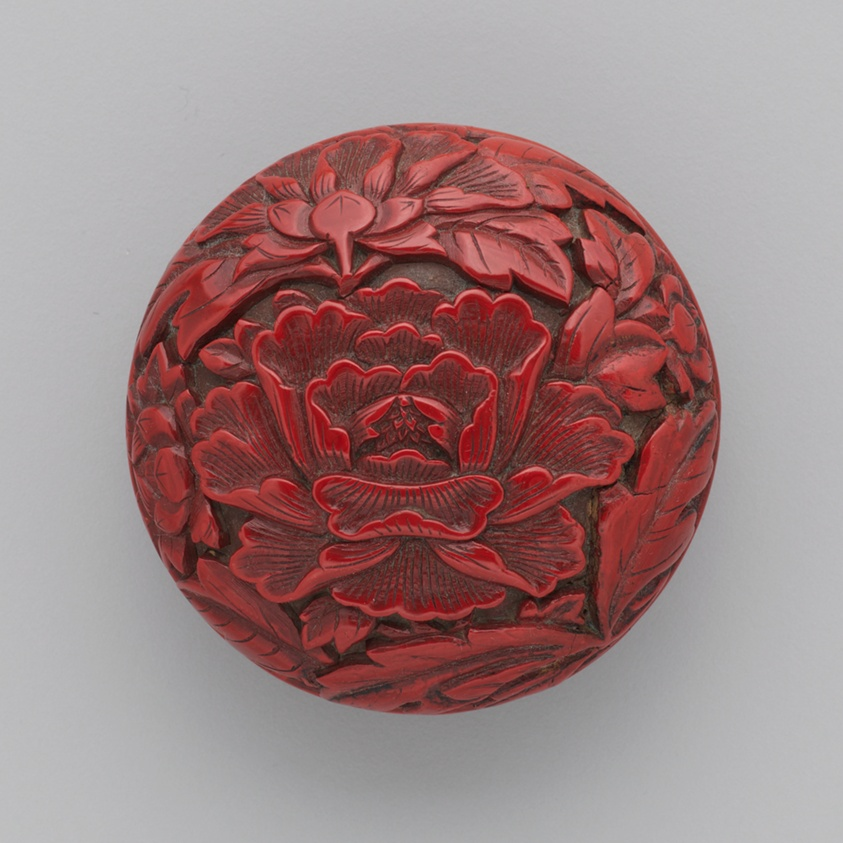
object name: Decorative Arts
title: Seal Paste Box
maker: China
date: Ming Dynasty (1368-1644), 15th century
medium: Carved lacquer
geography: China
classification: lacquer; seal